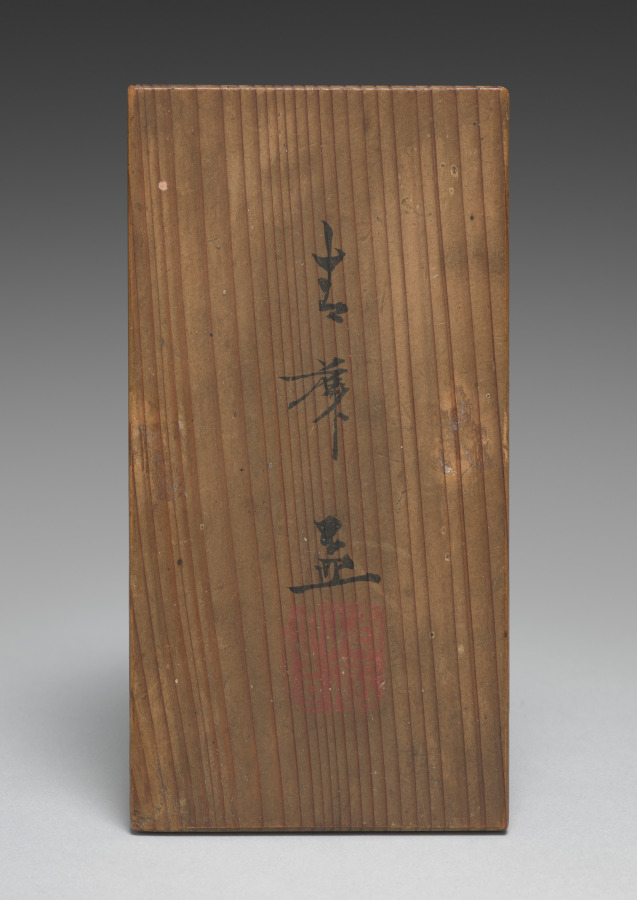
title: Sake Cups with Auspicious Flora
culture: Japan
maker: Seifū Yohei II (Japanese, 1844–1878)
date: 1861–78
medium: Pair of sake cups; porcelain with underglaze blue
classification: Ceramic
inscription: 松梅芝仙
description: Seifū Yohei II and his successor, Seifū Yohei III, trained in ink painting. Their brush skills are seen in their underglaze cobalt blue designs. One of Yohei II’s sake cups has depictions of orchid, bamboo, and chrysanthemum, representing spring, summer, and fall, while the other has pine and plum, representing winter. Just under the rim, he has also brushed the phrase “Pine, plum, and fungus immortals” (松梅芝仙).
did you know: These modest cups are important for the connoisseurship of the art of Yohei II because their original box is intact with a signature and seal on the interior of the lid.